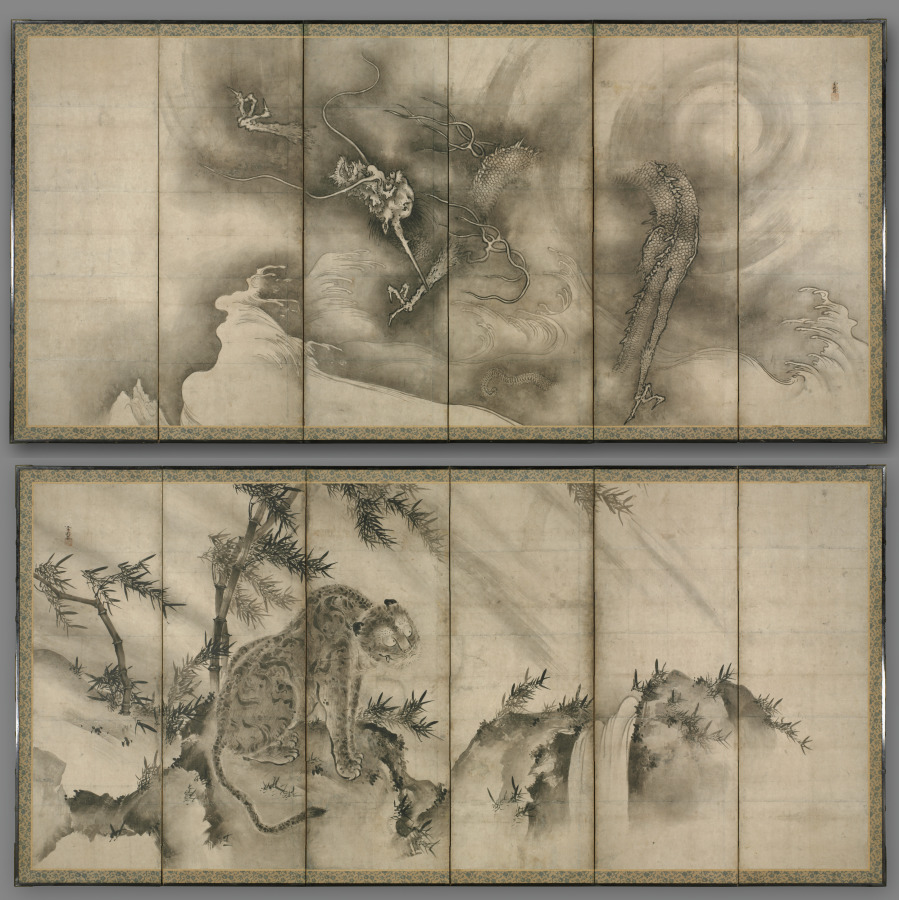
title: Dragon and Tiger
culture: Japan, Muromachi period (1392–1573) to Momoyama period (1573–1615)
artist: Sesson Shūkei (Japanese, c. 1492–c. 1577)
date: c. 1546–56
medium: Pair of six-panel folding screens; ink on paper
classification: Painting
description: A tiger sits in a bamboo grove whipped with fierce wind, while a dragon claws through clouds above rough waves. Tiger and dragon are Chinese cosmological symbols of the balancing forces in the world, yin (the feminine aspect) and yang (the masculine aspect). The tiger's roar is also said to generate wind, and the dragon clouds. The screens may have originally been meant to express the fluctuating nature of the world as envisioned in the practice of military divination, or forecasting, based on the Yijing (Book of Changes).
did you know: This pair of screens is considered the masterpiece of Sesson's body of work, and may have been created for the lord of Odawara in eastern Japan.